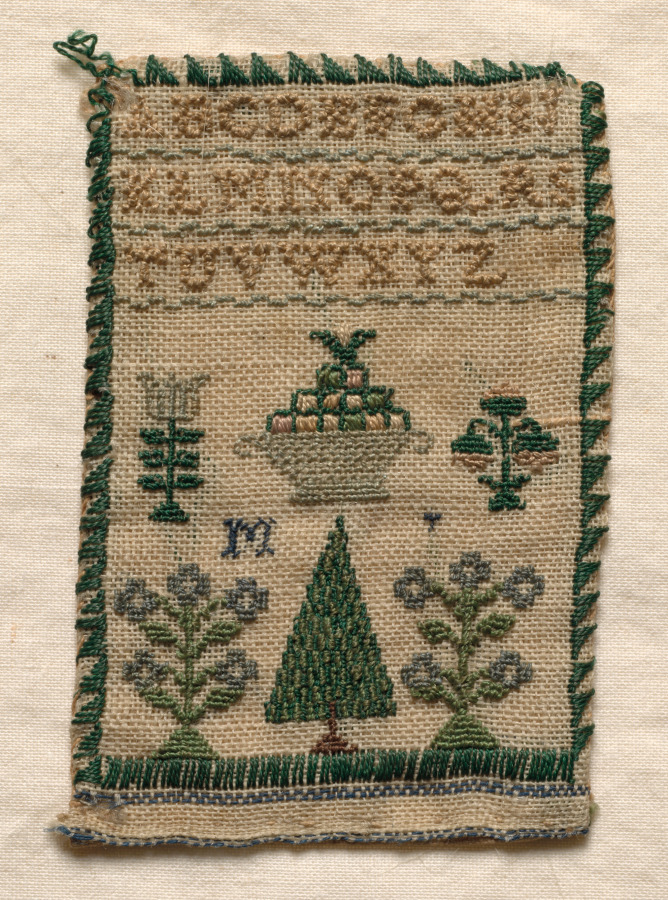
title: Sampler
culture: England, 19th century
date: 1800s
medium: embroidery; silk on woolen canvas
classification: Sampler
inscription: "ABCDEFGHIJ/ KLMNOPQRS/ TUVWXYZ."